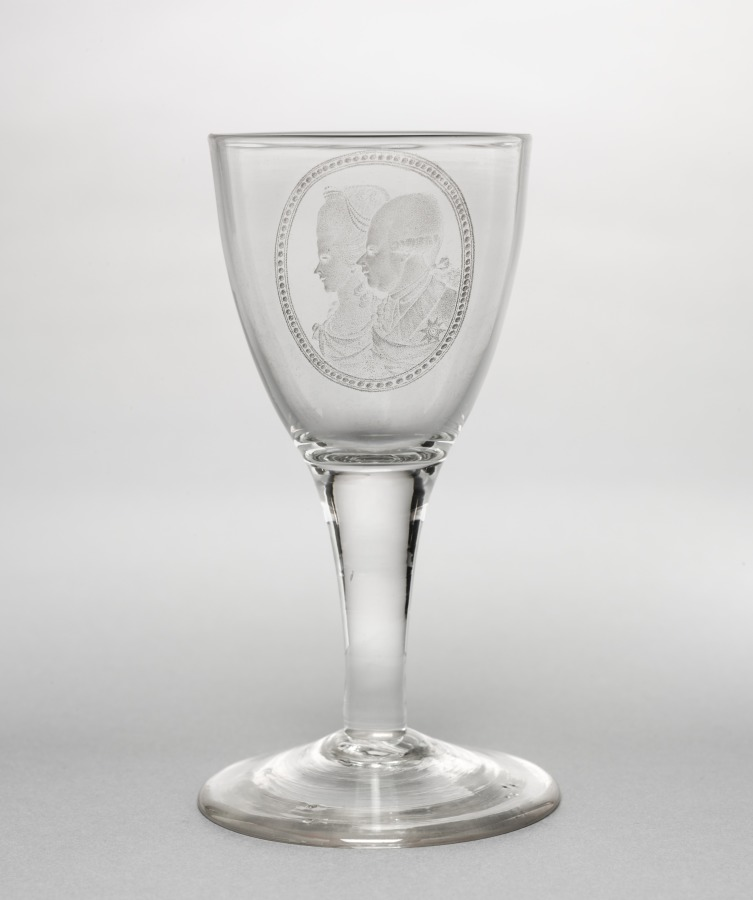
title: Goblet: Portrait of William V, Prince of Orange and his wife, Frederica Sophia Wilhelmine of Prussia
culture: Netherlands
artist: manner of David Wolff (Dutch, 1732–1798)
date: c. 1780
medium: glass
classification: Glass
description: Wolff was one of the most famous Dutch engravers of glass in the 18th century. The glasses upon which he worked were chiefly of English manufacture.